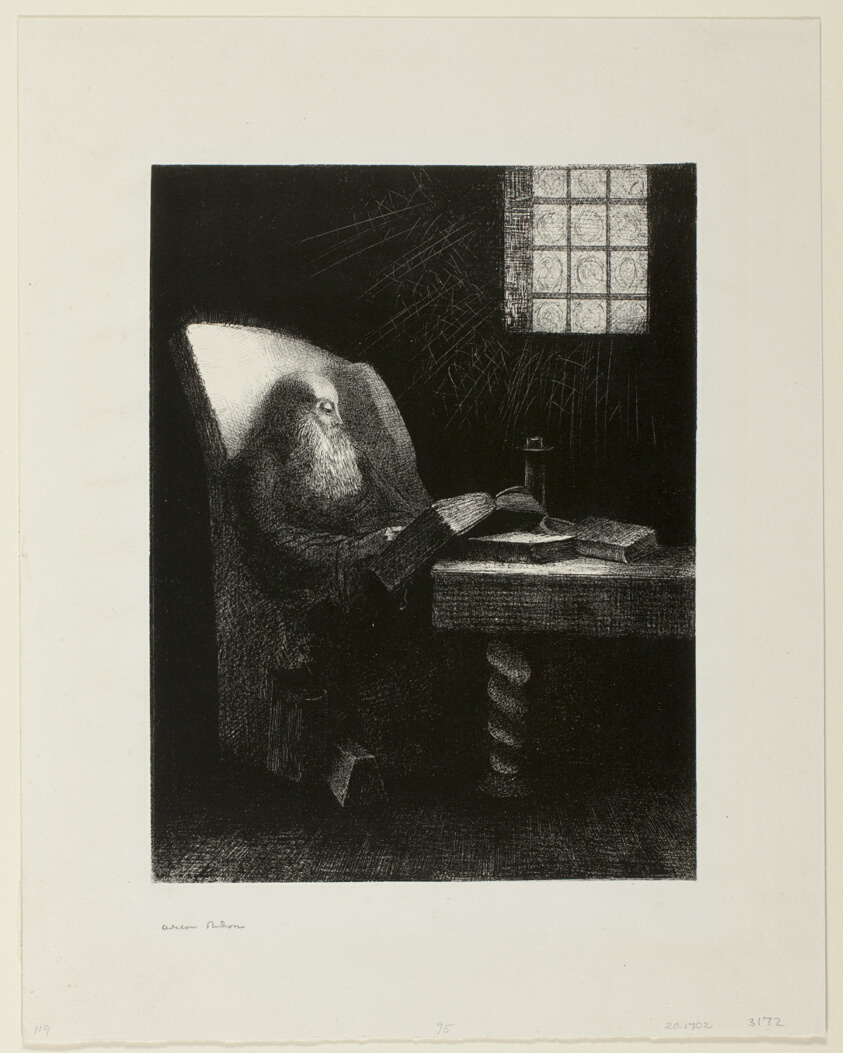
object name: Print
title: The Reader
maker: Odilon Redon (French, 1840-1916)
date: 1892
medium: Lithograph in black on ivory China paper, laid down on ivory wove paper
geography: France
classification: lithograph; print; prints and drawing; paper